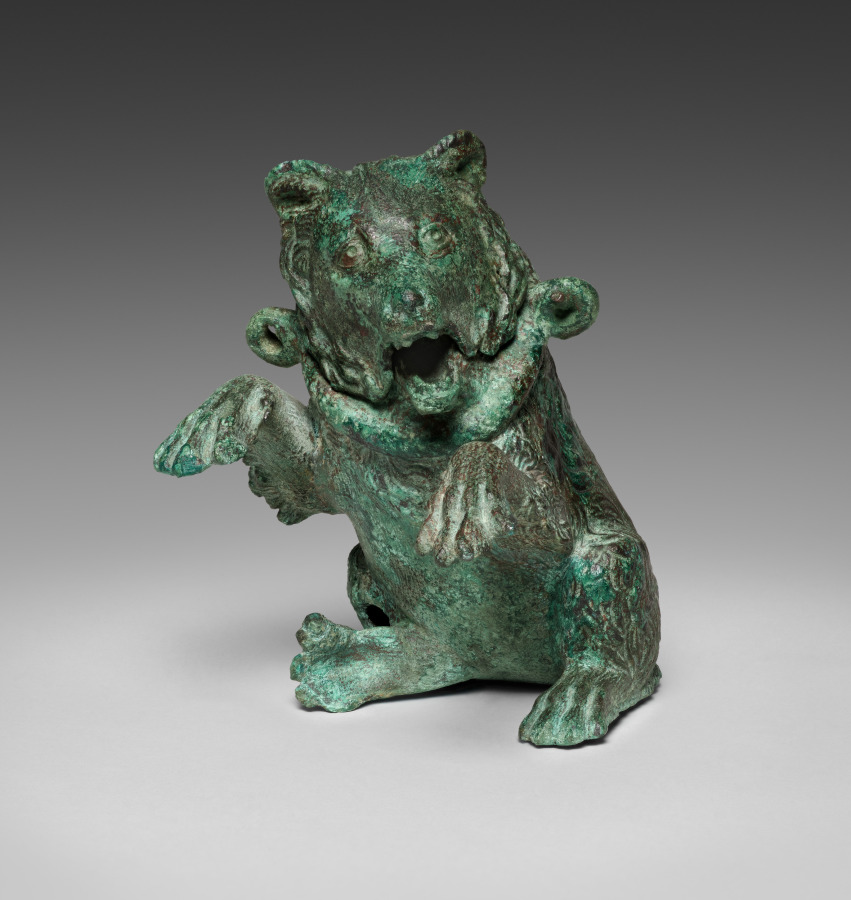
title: Oil Ampulla in the Form of a Dancing Bear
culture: Italy, Roman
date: 200s CE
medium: bronze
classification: Sculpture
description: This bronze bear sits on its hindquarters with its front paws raised, head slightly turned left, and mouth gaping open. It wears a collar around its neck with two rings on either side, where a chain would be passed through to suspend the ampulla. The bear’s head is hinged at the back of the collar to open the vessel, with the lower jaw forming a spout. The eyes were once pierced to prevent an airlock within the ampulla. Bears, like many other animals in antiquity, were used as a form of entertainment, demonstrated here by the bear’s “dancing” pose.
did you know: This ampulla was likely used to carry oil to the baths in antiquity.